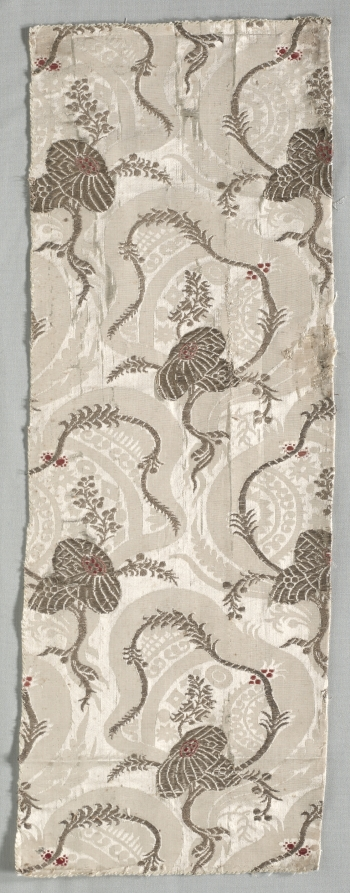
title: Textile Fragment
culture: Italy, Padua and Venice, 16th century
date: 1600s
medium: lampas weave, silk and gold thread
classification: Textile